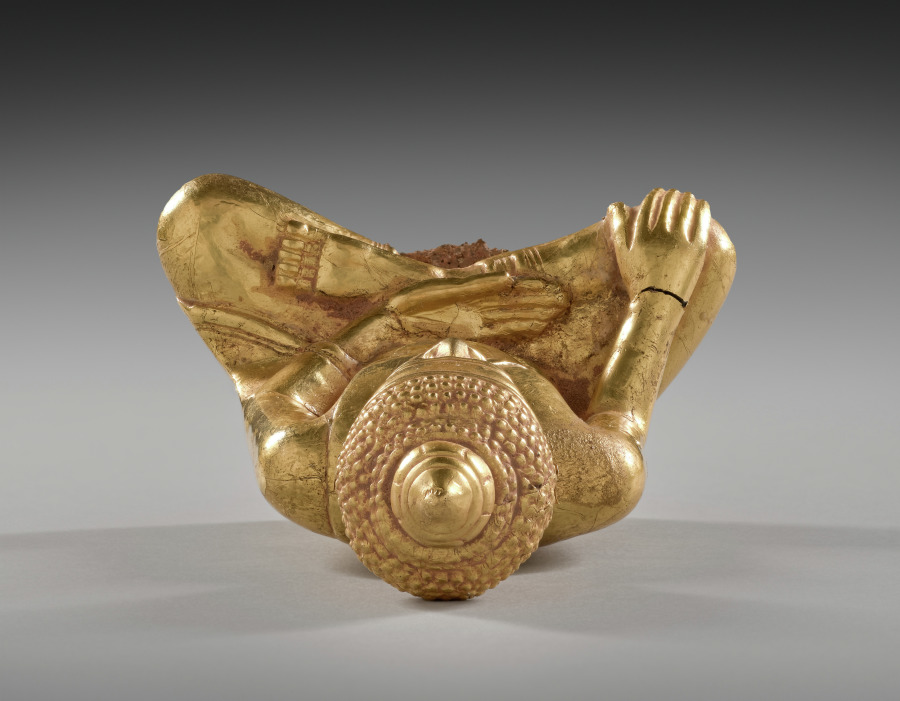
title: Seated Buddha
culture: Thailand, Ayutthaya, Wat Ratchaburana, 14th century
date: before 1424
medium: gold with resin core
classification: Sculpture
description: This pristinely modeled Buddha was fashioned from a sheet of 24-karat gold, using the repoussé (hammering) technique. The figure is filled inside with a resin core. The style is typical of the last phase of Khmer art (800s–1400s), the Lapburi style, which combines characteristics of both Cambodian and Thai sculptural styles.